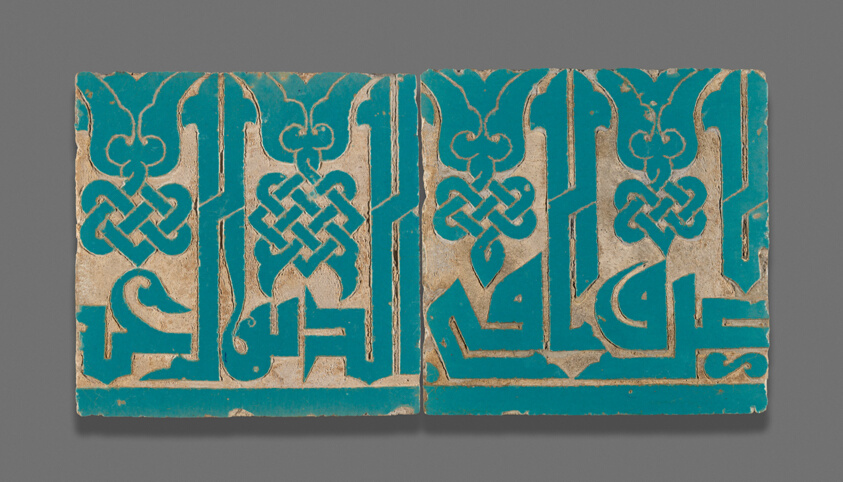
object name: Architectural fragment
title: Tiles with a Qur'anic Inscription in Knotted-Style Calligraphy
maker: Uzbekistan or Iran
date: Ilkhanid dynasty (1256-1353), Early 14th century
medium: Earthenware with carved decoration in a turquoise glaze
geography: Iran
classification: earthenware; asian art; ceramics; architectural fragment